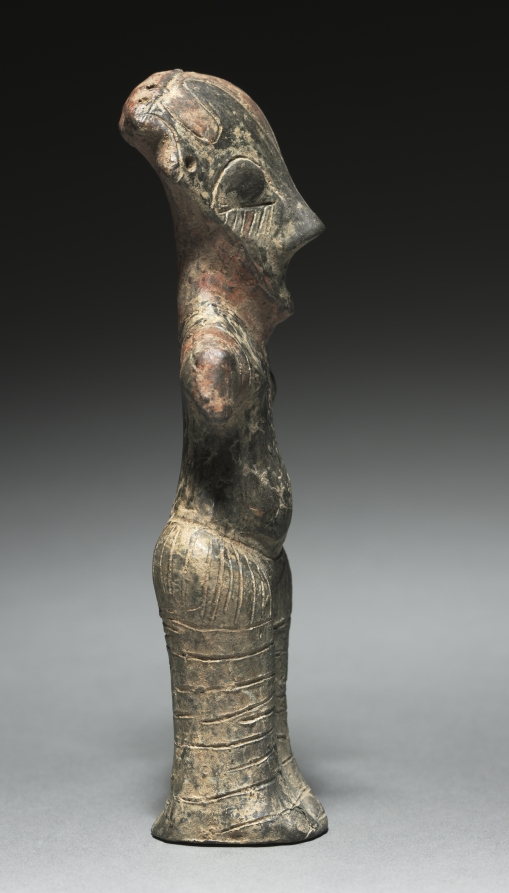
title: Vinca Idol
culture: Serbia, Vinça culture, Neolithic Era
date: 4500–3500 BCE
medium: fired clay with paint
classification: Ceramic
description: This statuette, probably a cult idol, dates to the Neolithic Era which saw the development of farming and human technology. It is extraordinarily well preserved and derives from the settlement at Vinca in modern Serbia. This flourishing culture was the largest known in Europe at that time, extending along the Danube into the Balkans and Central Europe. Thousands of clay statuettes have been discovered in the region's Vinca settlements suggestive of the intense magic-religious practices within the Vinca culture. This statuette is anthropomorphic, or human-shaped, and is presumed to have been used for ritual purposes. The use of red paint is typical of Vinca Neolithic figurines, and few have survived in such excellent condition.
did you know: If you look closely, you can see remnants of red pigment on this diminutive figure.